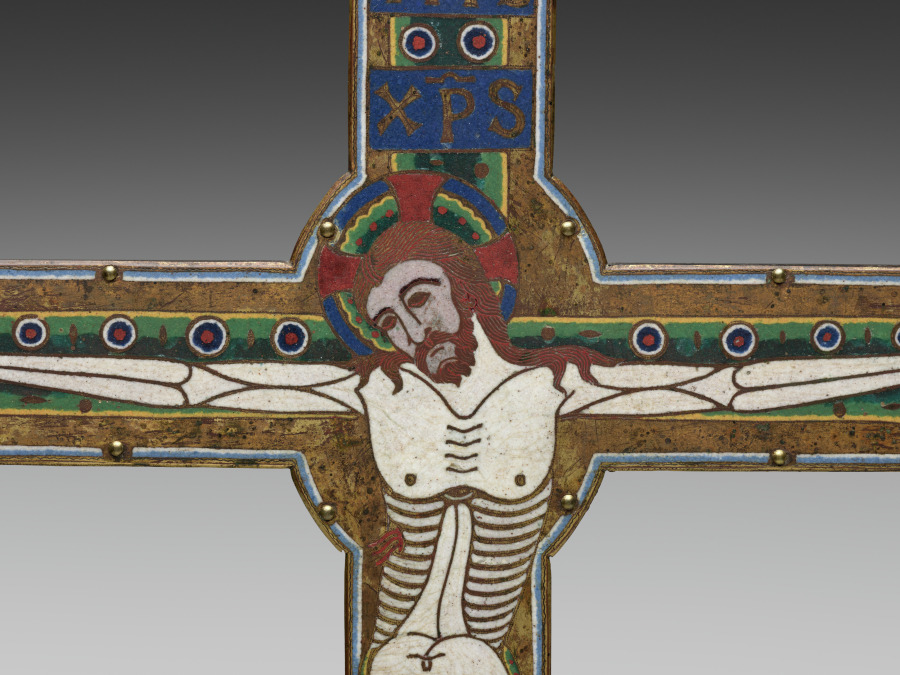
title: The "Spitzer Cross"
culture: France, Limoges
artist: Master of the Royal Plantagenet Workshop (French)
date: c. 1190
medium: copper: gilded, engraved, stippled; champlevé enamel; wood backing (modern)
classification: Enamel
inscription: inscription on titulus: IHS XPS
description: This fine enameled cross is named the "Spitzer Cross" after the Viennese art dealer and collector Baron Frédéric Spitzer, who owned it in the 19th century. It has justly been hailed as the finest Limoges enameled cross to survive. The work’s coloration exemplifies its refined craftsmanship. Rendered in white enamel, with fine lines defining the rib cage, abdomen, and muscles, Christ’s body contrasts strikingly with the vibrant green, blue, and yellow of his halo, loincloth, and the cross.